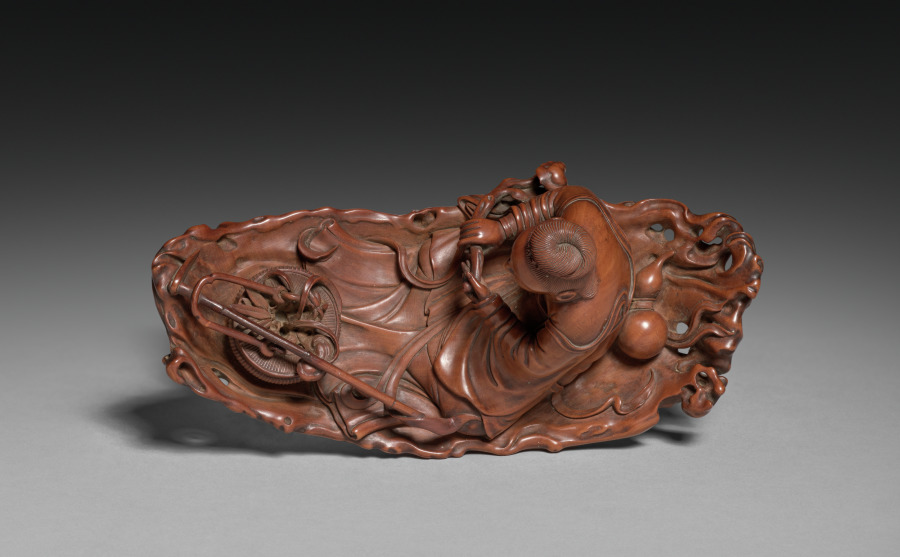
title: Figure of Daoist Immortal He Xiangu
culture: China, Qing dynasty (1644-1911)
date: 1700s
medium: Boxwood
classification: Wood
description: He Xiangu is one of the Eight Immortals in the Daoist pantheon. She was thought to have been a real person who lived in the Tang dynasty, originally named He Qiong. As a teenager, she was instructed in a dream to eat powdered mica to become immune from death and to vow to remain unmarried. She did so and became an enlightened practitioner of Daoism. In this delicate carving, He Xiangu is placidly seated in a gnarled and knotty wooden raft amid green-tinted ivory waves. In front of her rests a bamboo basket filled with objects associated with Daoist immortality, and she holds a branch of lingzhi fungus like an oar.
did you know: The lingzhi she holds is a woody mushroom often used in traditional Chinese medicine and associated with immortality.